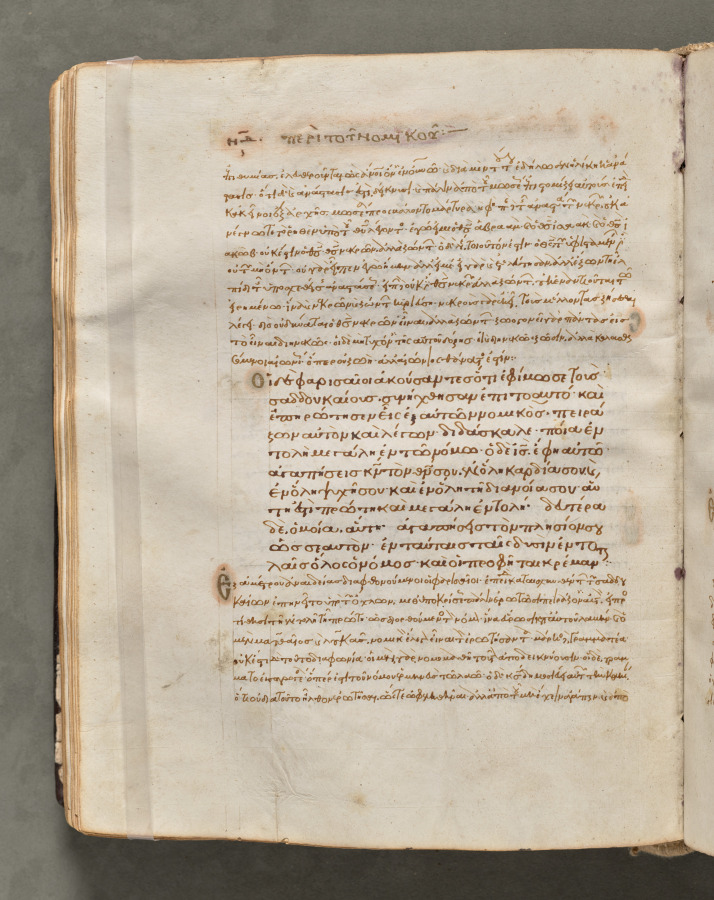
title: Text, folio 99 (verso), from a Gospel Book with Commentaries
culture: Byzantium, Constantinople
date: c. 1000–1100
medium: ink, tempera, and gold on vellum; leather binding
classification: Bound Volume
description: Each of the four gospels in this book opens on a page with brilliantly illuminated borders depicting the author of the text as well as birds-principally peacocks, symbols of the immortality of the soul-and fountains, representing the fountain of life and the salvation of the soul. This volume consists of 428 leaves with texts in Greek. Its level of sophistication suggests that it was probably written and decorated in a monastery in Constantinople.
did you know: Gospel Books were carried in procession through Byzantine churches.